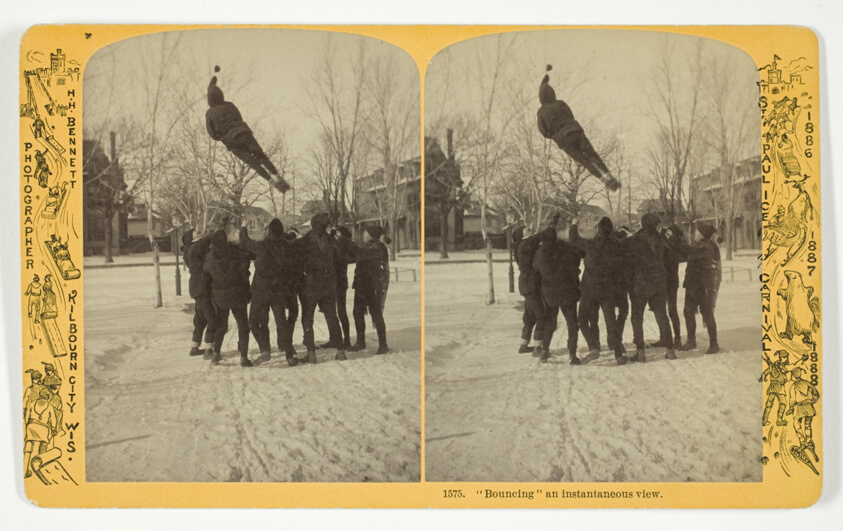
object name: Photograph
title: "Bouncing" an instantaneous view, No. 1575 from the series "St. Paul Ice Carnival"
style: 19th century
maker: Henry Hamilton Bennett (American, born Canada, 1843-1908)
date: 1886/88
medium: Albumen print, stereo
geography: United States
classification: photography; photograph; albumen silver print; stereograph (albumen)